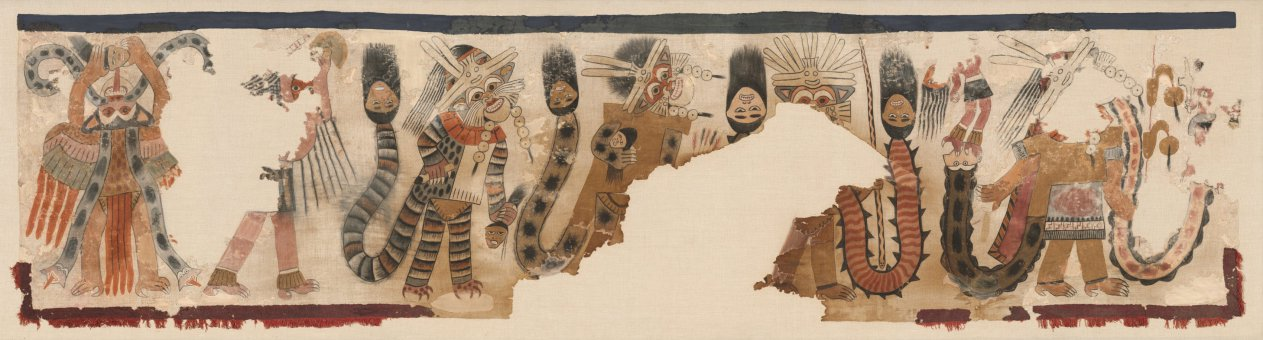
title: Cloth with Procession of Figures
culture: Central Andes, South Coast, Nasca people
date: 170 BCE–70 CE (radiocarbon date, 95% probability)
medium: cotton and pigment (field); camelid fiber (borders and fringe)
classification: Textile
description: Experts agree that this cloth is one of the greatest paintings to survive from Andean antiquity due to the realism, complexity, large size, and refined execution of its figures. All but one of the figures wear the whiskered mouth mask of Nasca supernatural beings and several carry or wear severed human heads, which the Nasca linked to nature’s fruitfulness. Thus, the figures seem to represent supernatural forces or humans personifying such forces during a ritual devoted to agricultural fertility. Originally, the panel was attached along its upper edge to a dark blue cloth of equal size. The complete textile may have served as a mantle (a shawl-like garment), a hanging, or a funerary offering.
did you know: Characteristics of the pampas cat and the emperor tamarin monkey are visible in the marching figures.